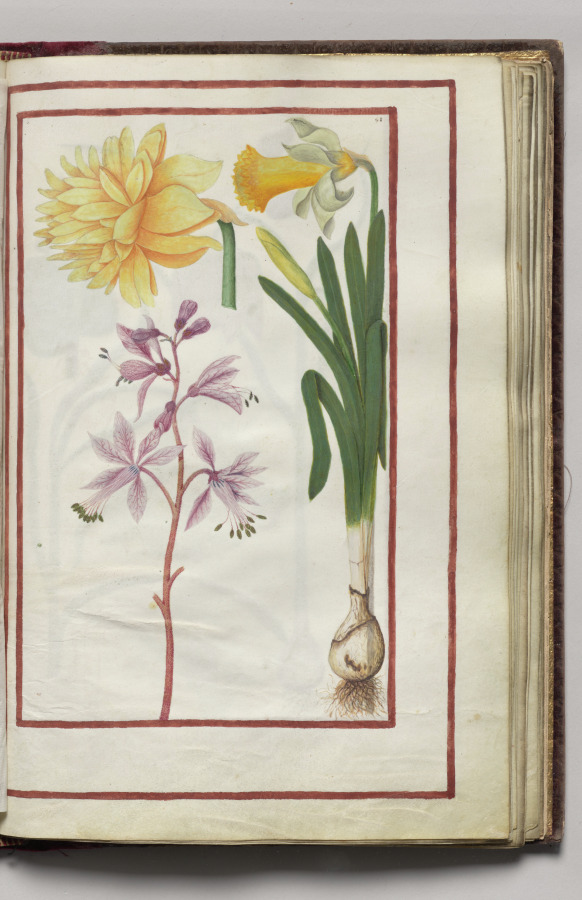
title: Double Narcissus and Single Narcissus, folio 26 (recto), from Florilegium (A Book of Flower Studies)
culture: France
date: 1608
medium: watercolor, ink, silver, and gold over occasional traces of pencil, on vellum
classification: Bound Volume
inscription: Dated: Poitiers 1608 (on frontispiece) Signed: On frontispiece in black ink, lower right: Van Kuyk Notation on drawing: Frontispiece: in pencil, lower margin: * élève de Van Kessel, peintre flammand (* in pencil also appears in front of Van Kuyk's name).